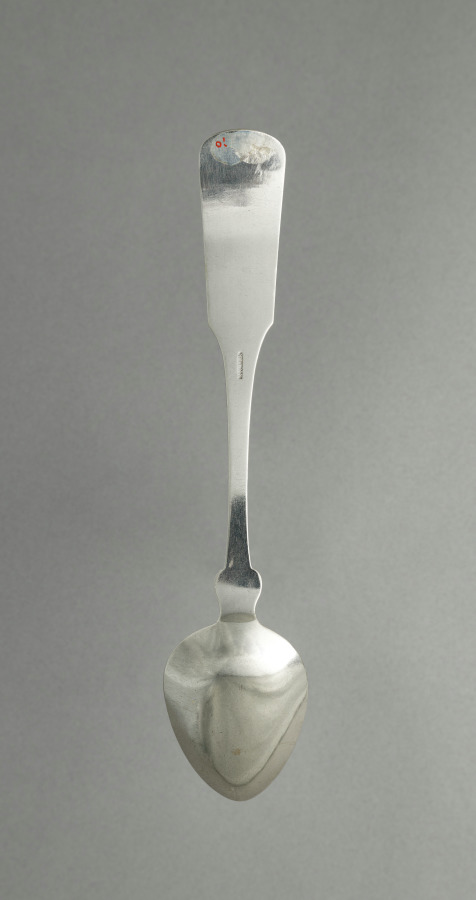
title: Tablespoon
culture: America, New York, Rochester, 19th century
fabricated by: Erastus Cook (American, 1793–1864)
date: c. 1850–1860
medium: silver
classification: Silver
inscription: "SH" in bright-cut script on top of handle end.